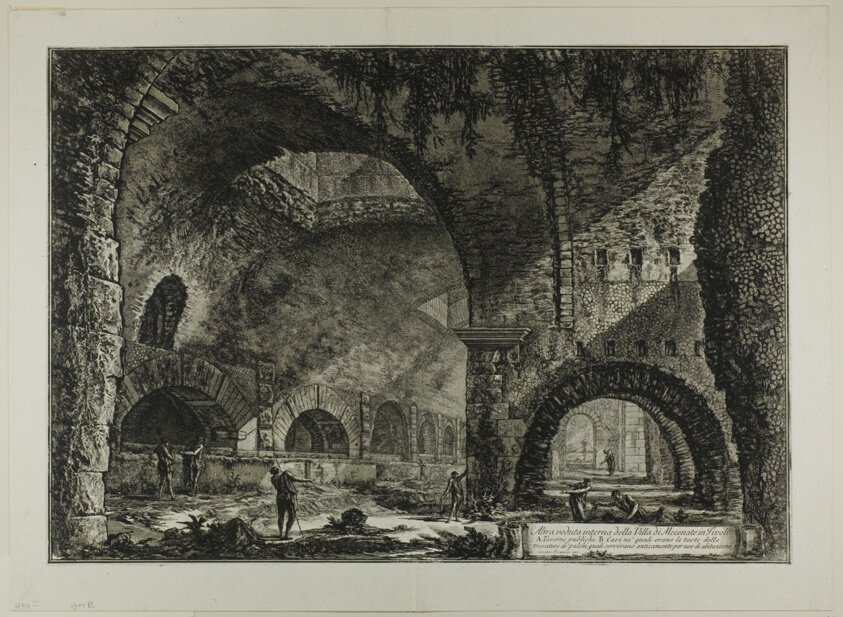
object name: Print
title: Another interior view of the Villa of Maecenas, Tivoli, from Views of Rome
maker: Giovanni Battista Piranesi (Italian, 1720-1778); published by Francesco (Italian, 1758-1810) and Pietro Piranesi (Italian, born 1758/9)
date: 1767, published 1800–07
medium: Etching on heavy ivory laid paper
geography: Italy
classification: etching; print; prints and drawing